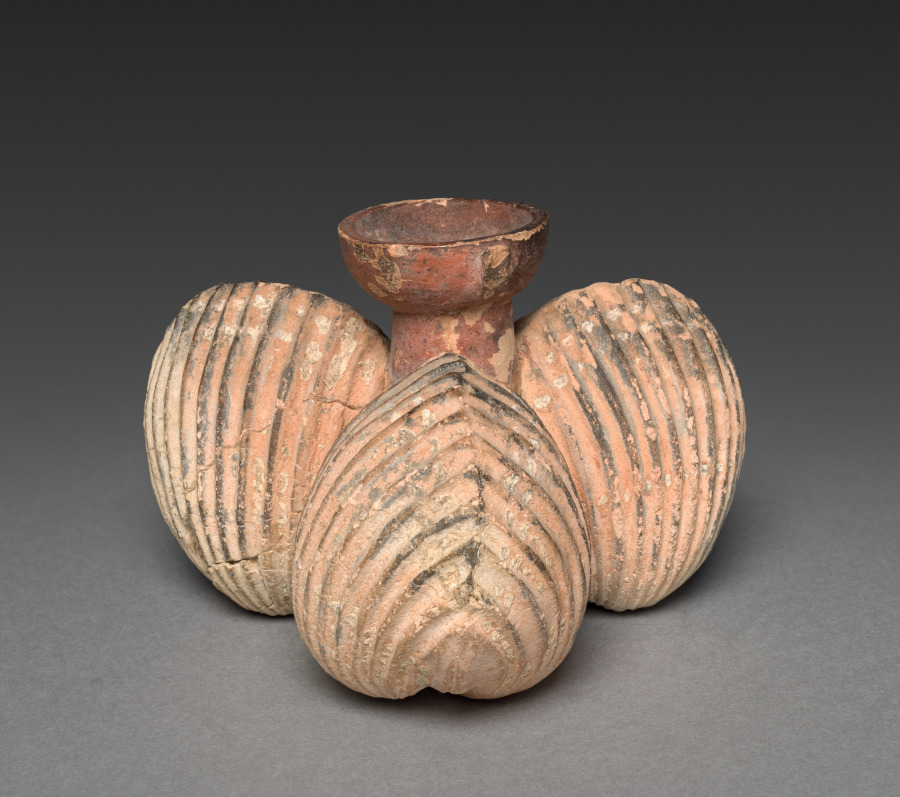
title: Cockleshell Aryballos (Oil Vessel)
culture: Greek, Attic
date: late 500s–early 400s BCE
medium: ceramic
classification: Ceramic